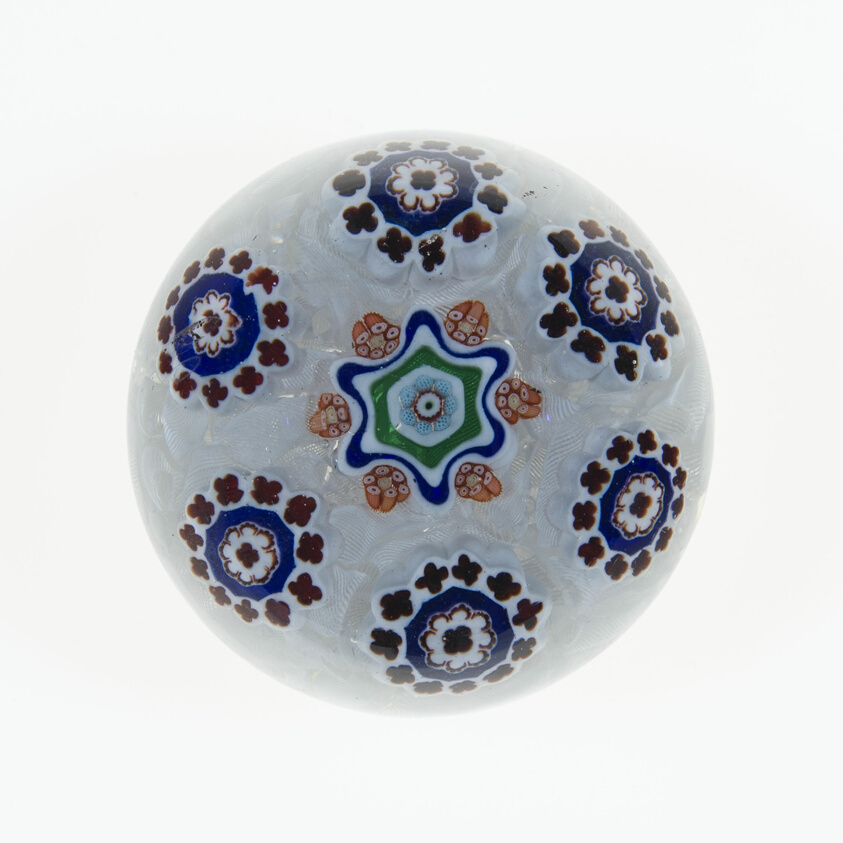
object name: Glass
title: Paperweight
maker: Baccarat Glassworks (Cristalleries de Baccarat); Lorraine, France, founded 1764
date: c. 1846–55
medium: Glass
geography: Lunéville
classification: paperweight; millefiori; european decorative arts; glass